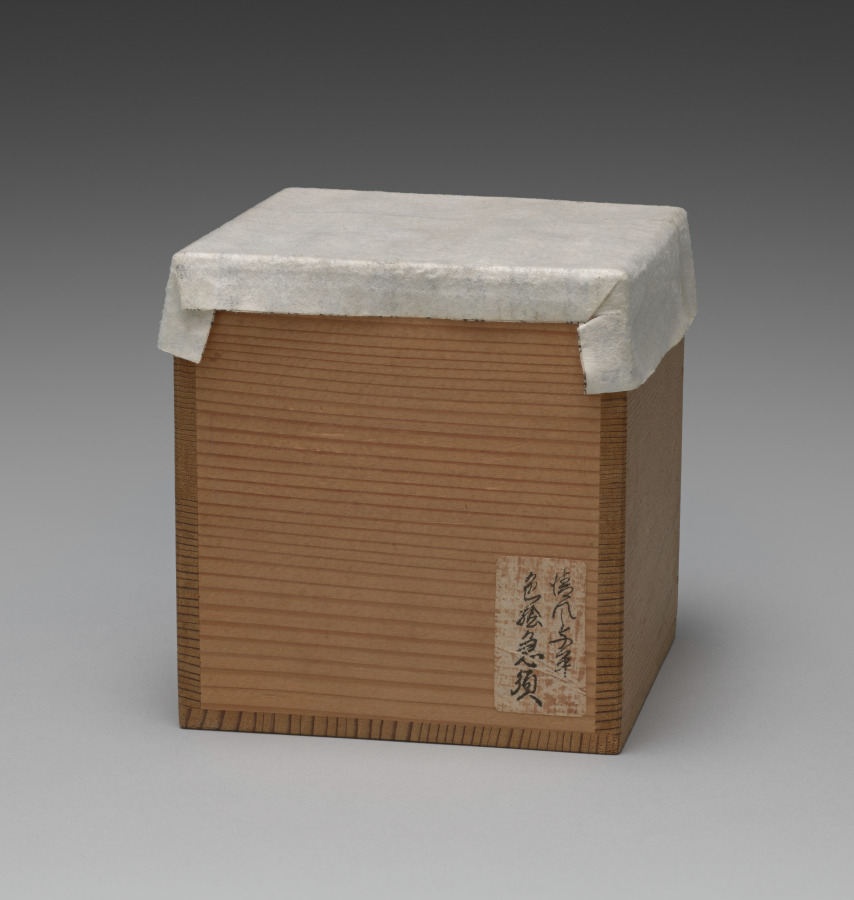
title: Teapot with Chrysanthemums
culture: Japan, Meiji period (1868–1912)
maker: Seifū Yohei III (Japanese, 1851–1914)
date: 1912–14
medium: Porcelian with overglaze enamel and gold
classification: Ceramic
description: This teapot with recessed lid has a bold, realistic design of pale yellow and white chrysanthemums rendered in overglaze color enamels and dotted gold centers. Black contour lines define the yellow and white flowers and their green stems and leaves. Small pink and purple chrysanthemums are rendered as simple motifs, their shapes defined in contrast to the white ground of the pot.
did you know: This side-handled teapot is designed for brewing and serving sencha.